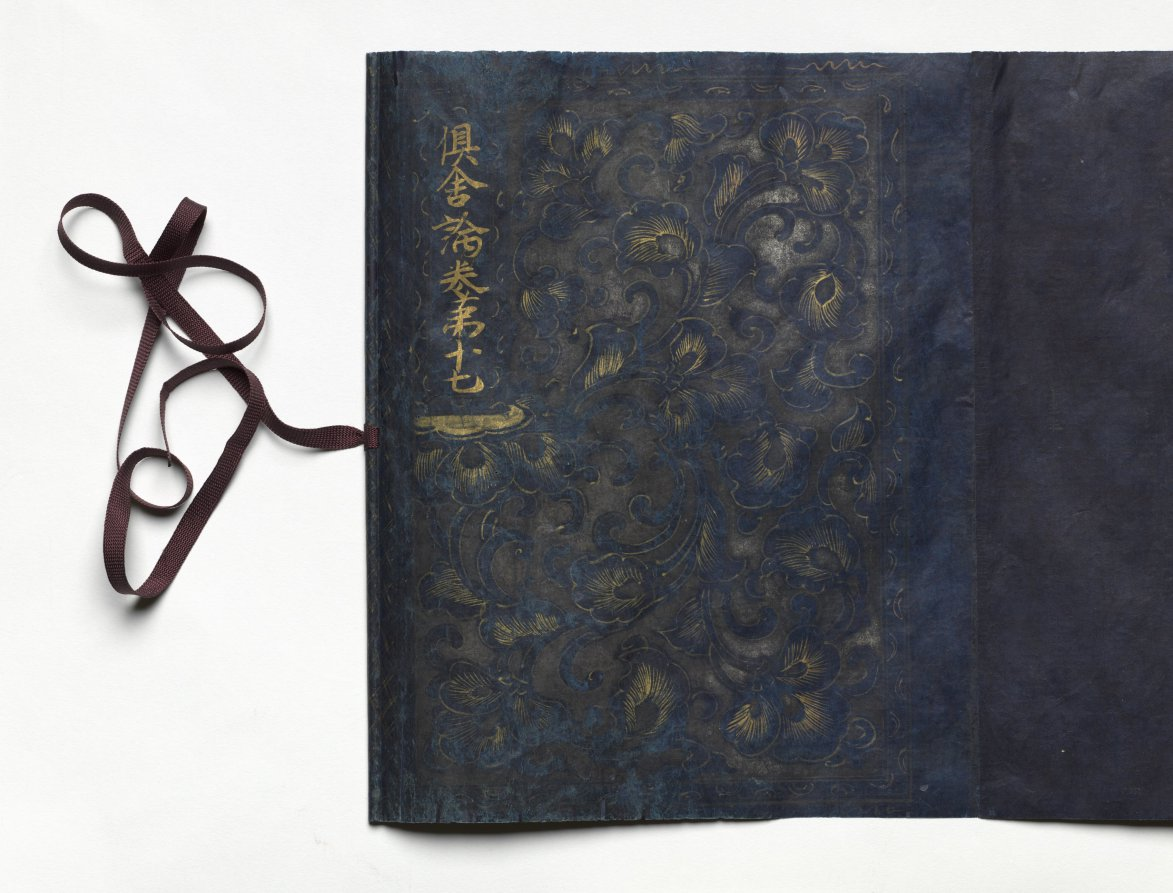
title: Meta-Discourse on the Teachings from the Treasury (Abidharmakosha-Bhashya)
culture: Japan, Heian period (794–1185)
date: 1100s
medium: handscroll; gold and silver on indigo-dyed paper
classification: Manuscript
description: This religious text relates some of the teachings of the great fourth-century Indian Buddhist scholar Vasubhandhu. The text analyzes human consciousness in its relationship to the environment and transformations that occur during meditation. This scroll is the 17th part of a 30-part translation of the text by Xuanzang, an eminent seventh-century Chinese monk.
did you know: The frontispiece depicts the Buddha Shakyamuni preaching in a paradisical landscape.